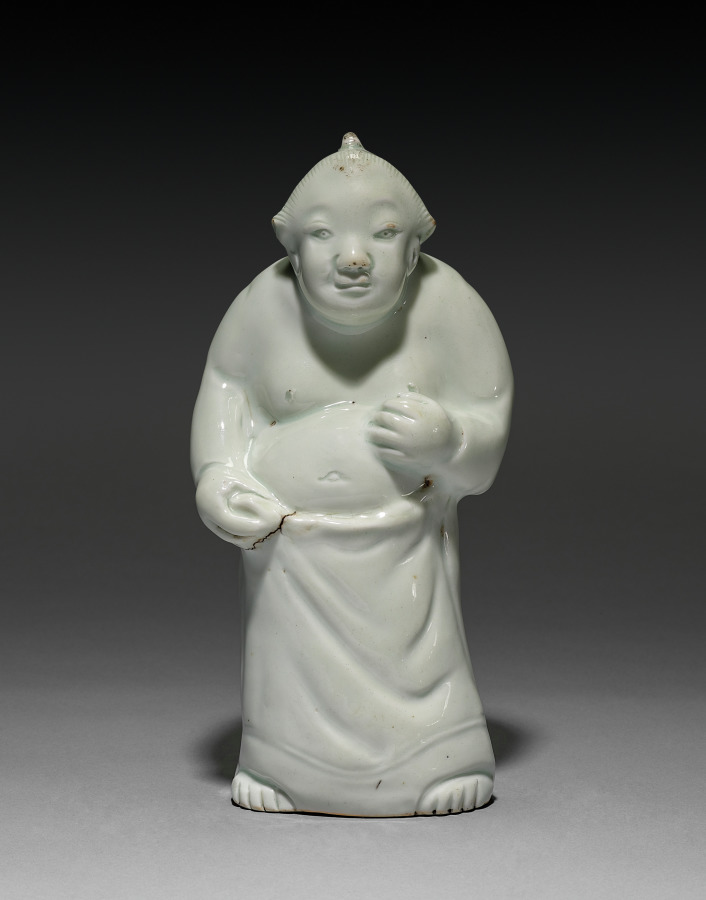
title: Standing Figure of a Sumo Wrestler, Arita Ware (?)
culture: Japan, Edo period (1615–1868)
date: 1700s-1800s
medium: porcelain, molded and carved, with celadon overglaze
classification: Sculpture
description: Catalogue of the Severance and Greta Millikin Collection (CMA, 1990): 85, no. 137.